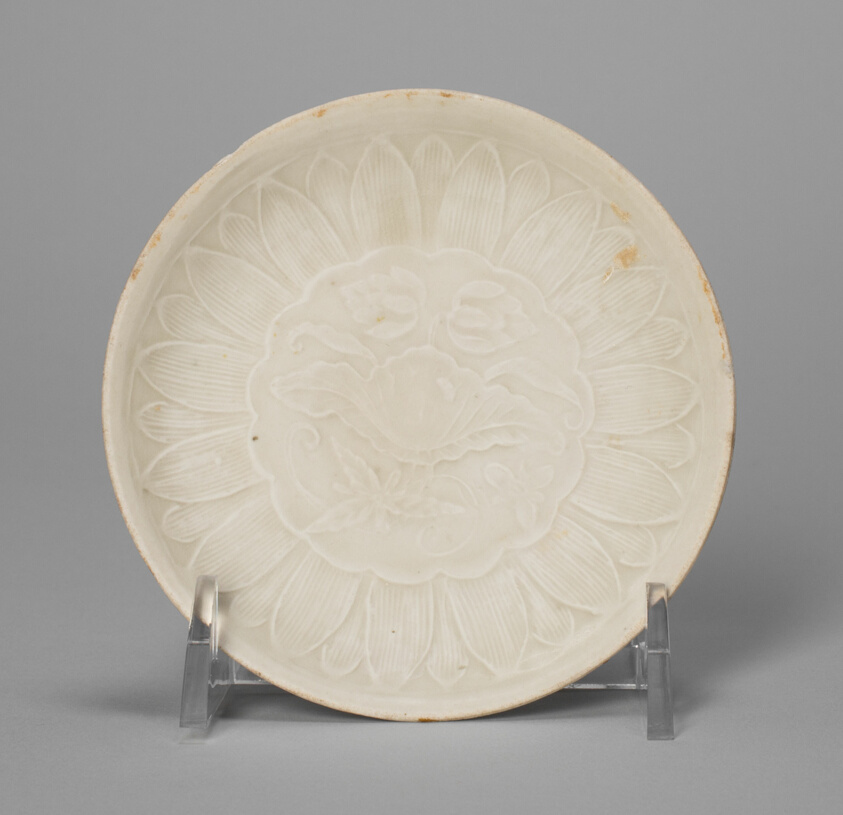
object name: Vessel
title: Dish with Flowers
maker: China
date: Song Dynasty (960–1279)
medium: Stoneware with underglaze carved decoration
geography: China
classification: ceramics; asian art